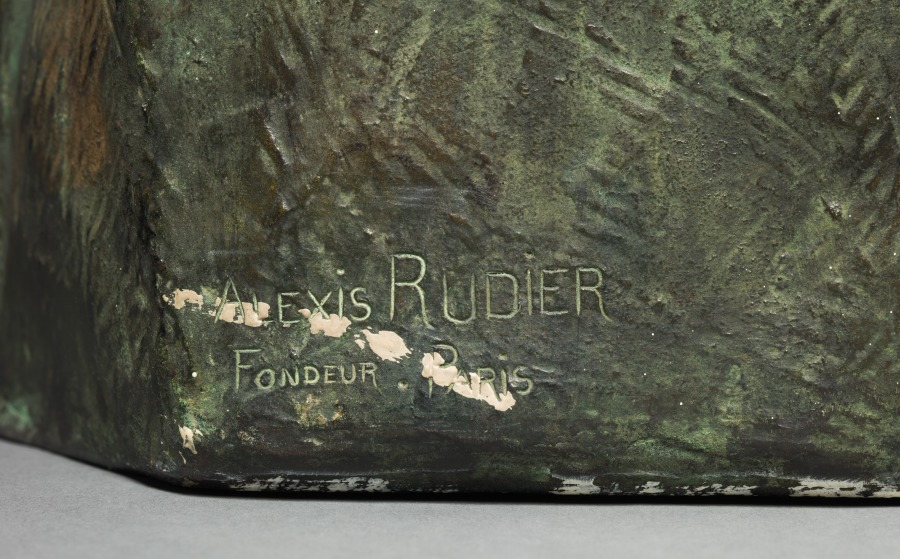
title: The End of Rembrandt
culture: France, 20th century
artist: Emile Antoine Bourdelle (French, 1861–1929)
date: 1909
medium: bronze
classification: Sculpture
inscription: Dated: "1909"